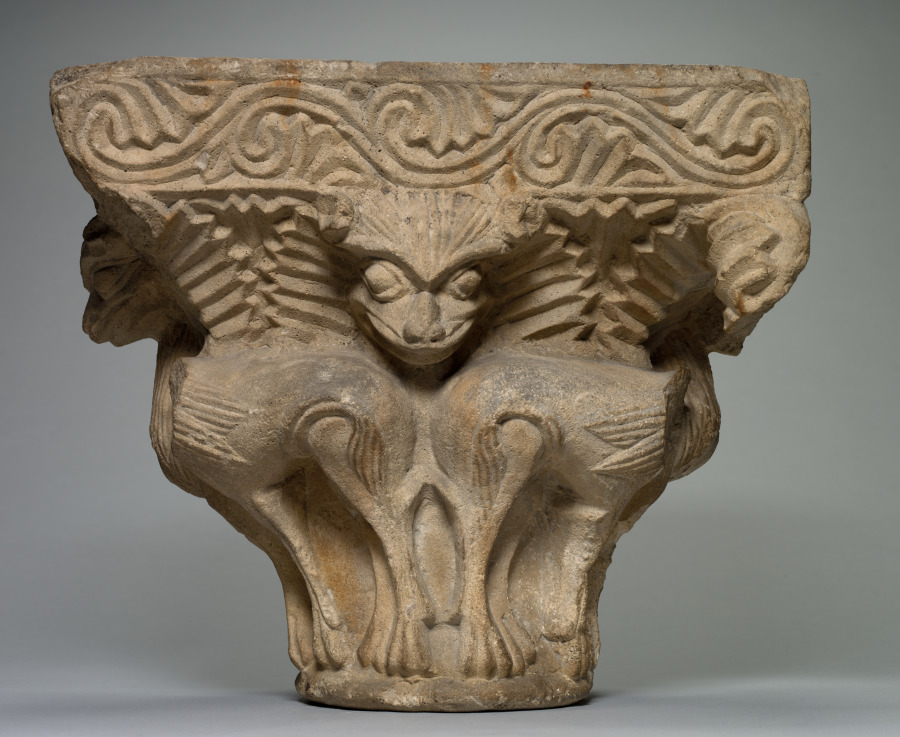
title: Capital with Addorsed Quadrupeds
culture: Southwest France, Languedoc, Toulouse (?), late 12th to early13th Centuries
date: late 1100s-early 1200s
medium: limestone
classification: Sculpture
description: Monstrous images were prevalent in the decoration of religious buildings during the Middle Ages. Such images must have impressed, perhaps even terrified, the monks and visitors who spent much of their time within the cloister or church, a place of prayer, contemplation, and reflection. Scholars have speculated how such images would have been received by the people given the ubiquity of monsters in medieval society. The carved monsters, often symbolizing vice and retribution for sin, were possibly designed to provoke a range of emotional responses including laughter, wonder, surprise, fear, and shock. This striking imagery must have had a strong impact, which in turn led Saint Bernard of Clairvaux (1090–1153), the spiritual head of the Cistercian order, to admonish their use as distracting from prayer.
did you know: A quadruped is an animal with four feet; the specific animal shown here is unidentified.